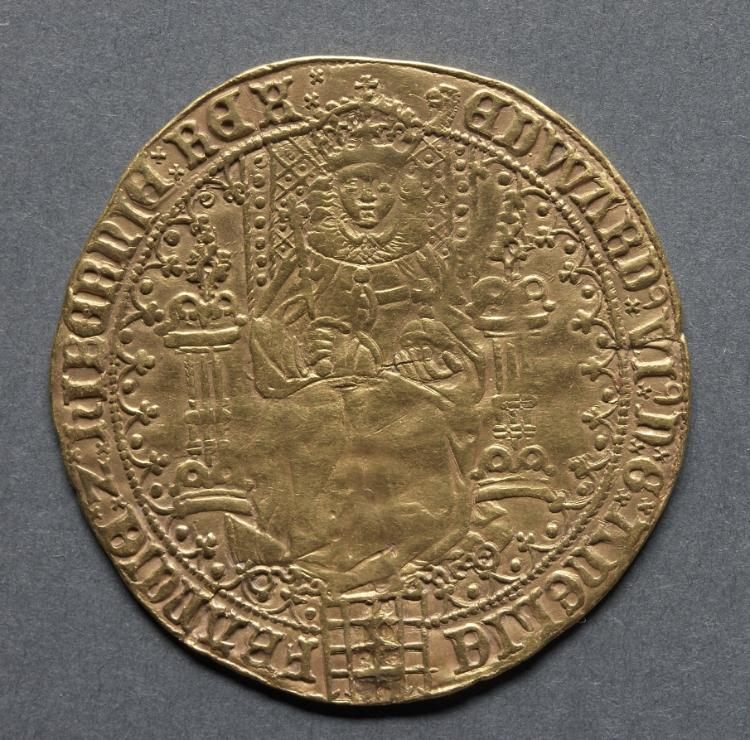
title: Sovereign of Thirty Shillings: Edward VI Enthroned (obverse)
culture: England, Edward VI, 1547-1553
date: 1550–1553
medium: gold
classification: Coins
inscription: EDWARD VI DG ANGILE FRAN DIE Z HIBERNIAE REX